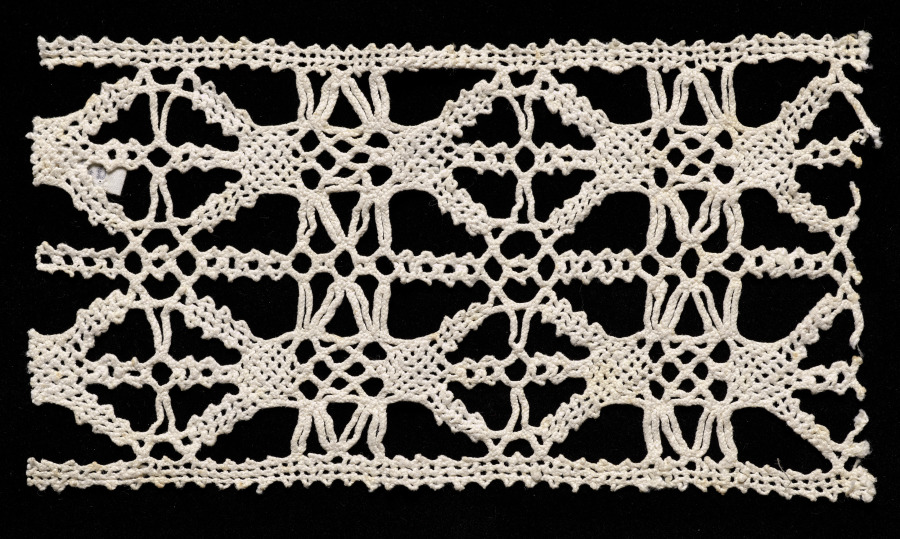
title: Lace Insertion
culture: Italy, Venice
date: 1540–60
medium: Bobbin lace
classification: Lace